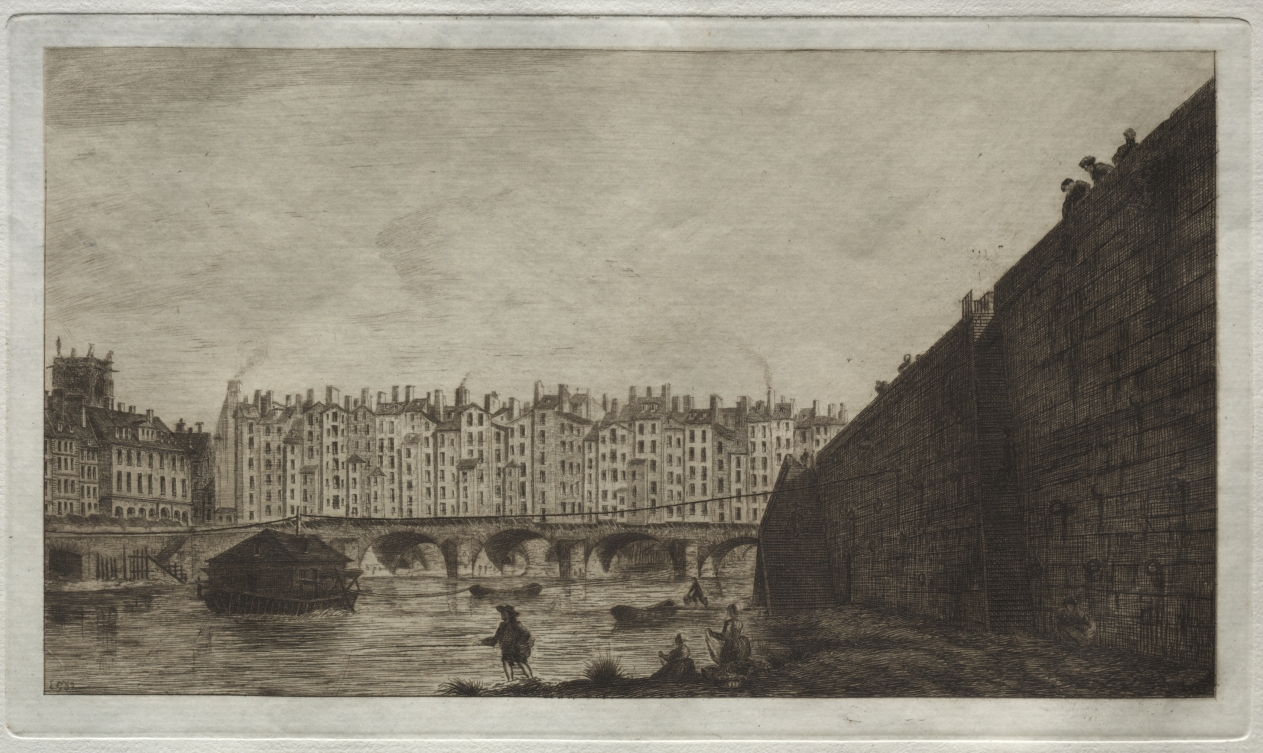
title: Le Pont-au-change, Paris, vers 1784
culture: France, 19th century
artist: Edmond Gosselin (French)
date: c. 1881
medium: etching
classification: Print